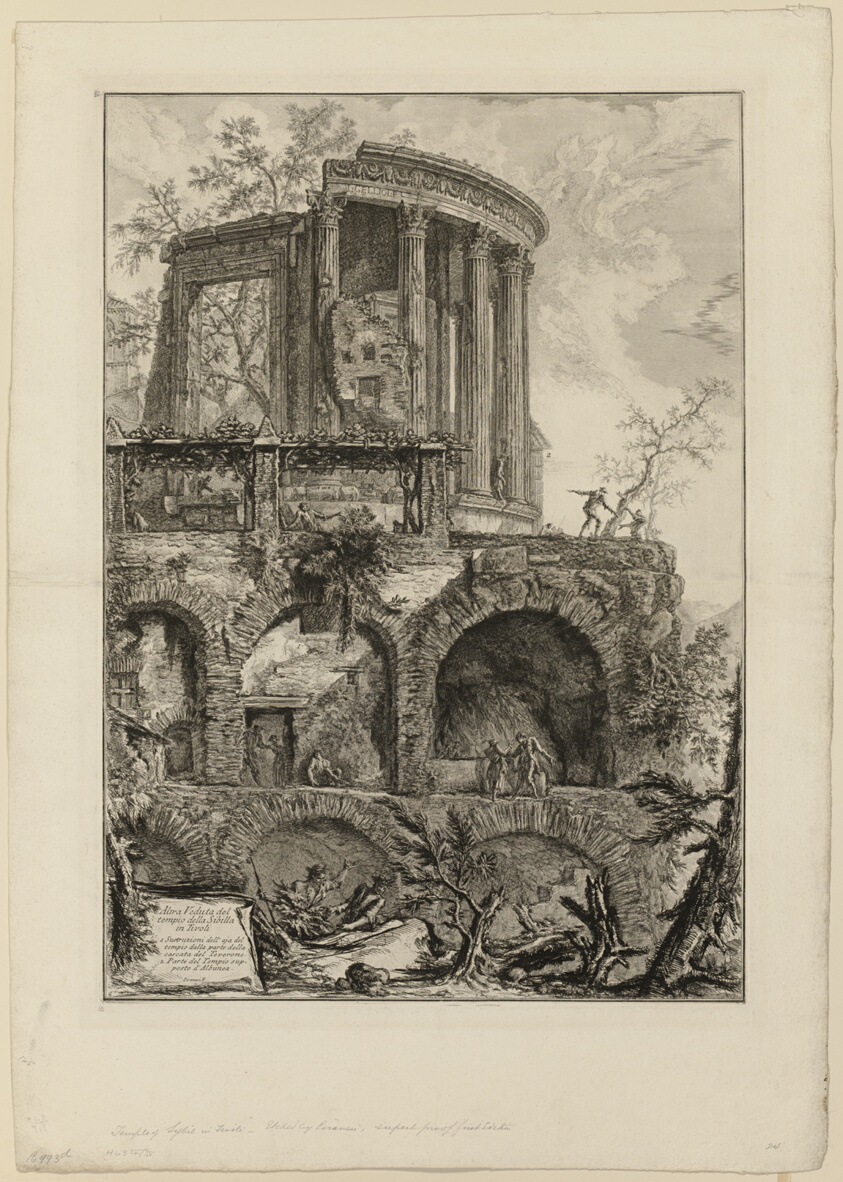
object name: Print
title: Another view of the Temple of the Sibyl in Tivoli, from Views of Rome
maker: Giovanni Battista Piranesi (Italian, 1720-1778); published by Francesco (Italian, 1758-1810) and Pietro Piranesi (Italian, born 1758/9)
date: 1761, published 1800–07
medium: Etching on heavy laid paper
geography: Italy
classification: etching; print; prints and drawing